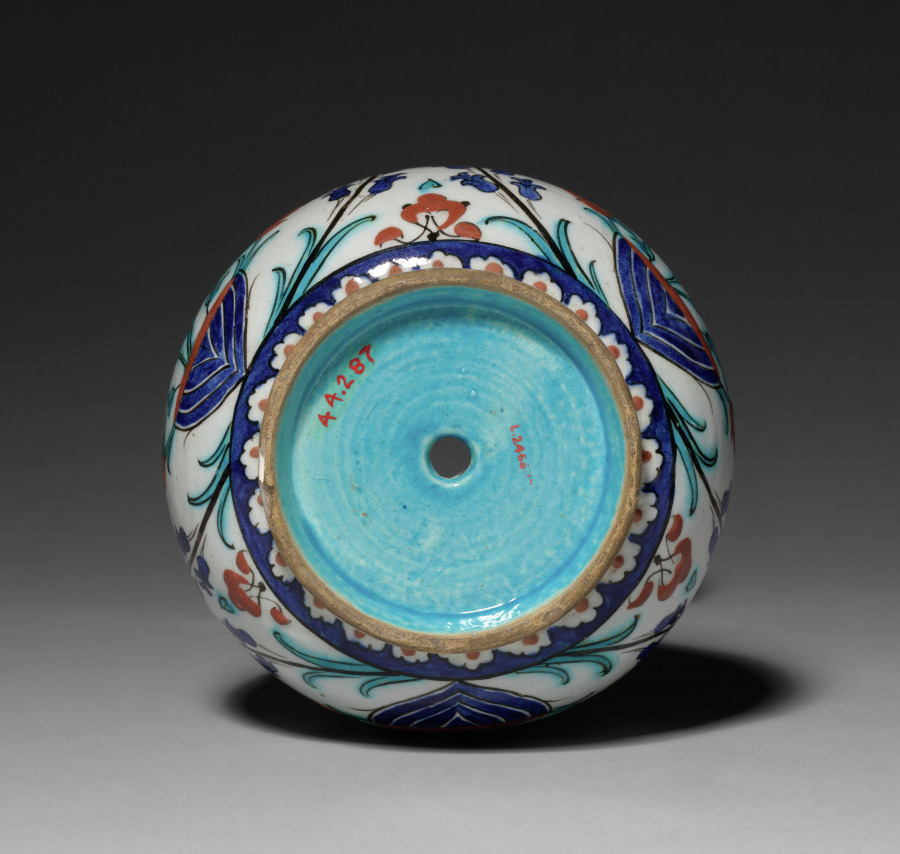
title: Mosque Lamp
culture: Turkey, Iznik, Ottoman period (1299–1922)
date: 1585–95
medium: Fritware with underglaze design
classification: Ceramic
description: Mosque lamps typically functioned as a lampshade, containing an oil lamp inside. Due to the opacity of this Ottoman lamp, it is likely that its primary function was not illumination. Instead, it would have been hung from chains in a mosque or mausoleum to add to the beauty of the space. This lamp is decorated with bright red carnations and blue hyacinths with additional floral and vegetal elements. The turquoise loops would have served for suspension from the ceiling. It is also possible that lamps like this were used as acoustic devices, softening the echo of prayer and discussion within the mosque’s halls.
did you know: Fritware is made of ground quartz, glass frit (partially fused glass), and a small proportion of fine white clay to approximate the light color and weight of Chinese porcelain.